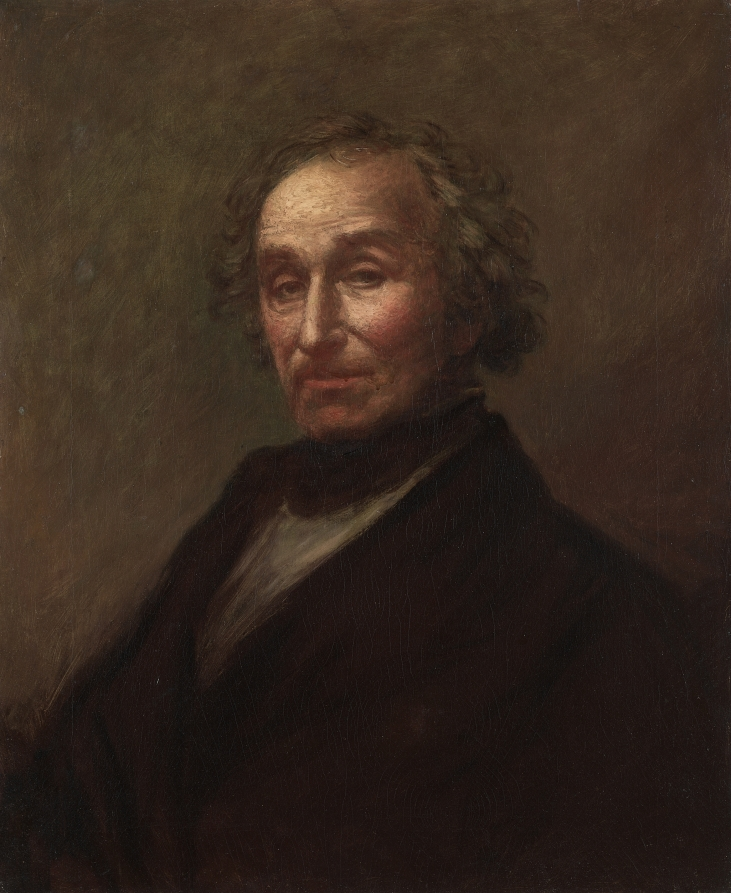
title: Alvan Clark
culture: America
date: 1870s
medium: oil on canvas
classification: Painting